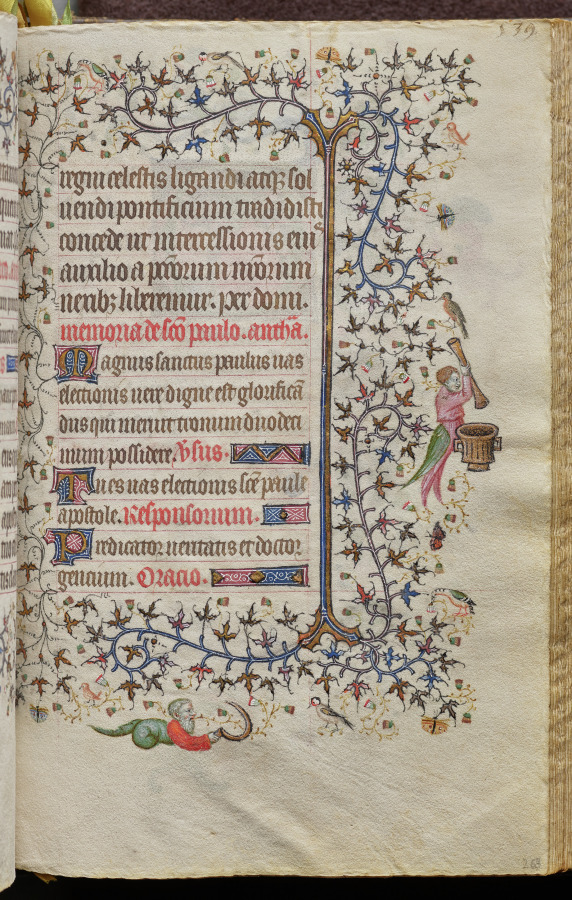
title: Hours of Charles the Noble, King of Navarre (1361-1425): fol. 264r, Text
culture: France, Paris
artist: Master of the Brussels Initials and Associates (French)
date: c. 1405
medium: ink, tempera, and gold on vellum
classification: Bound Volume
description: This precious volume was obviously highly prized by its owner, the French-born King of Navarre, who had his coat of arms painted on no less than twenty folios. Rather than directly commissioning this manuscript from a specific workshop, it seems that Charles the Noble acquired his book of hours -- perhaps ready-made for the luxury market -- while on a trip to Paris in 1404-05. A collaborative effort, six painting styles are evidenced within the pages of this codex, those of two Italians, two Frenchmen, and two Netherlanders. The painter who was responsible for the planning and decoration of the book, and who produced seventeen of the large miniatures, was a Bolognese artist known as the Master of the Brussels Initials. His principal assistant, responsible for most of the borders, was a Florentine who signed his name "Zecho" da Firenze on folio 208 verso.